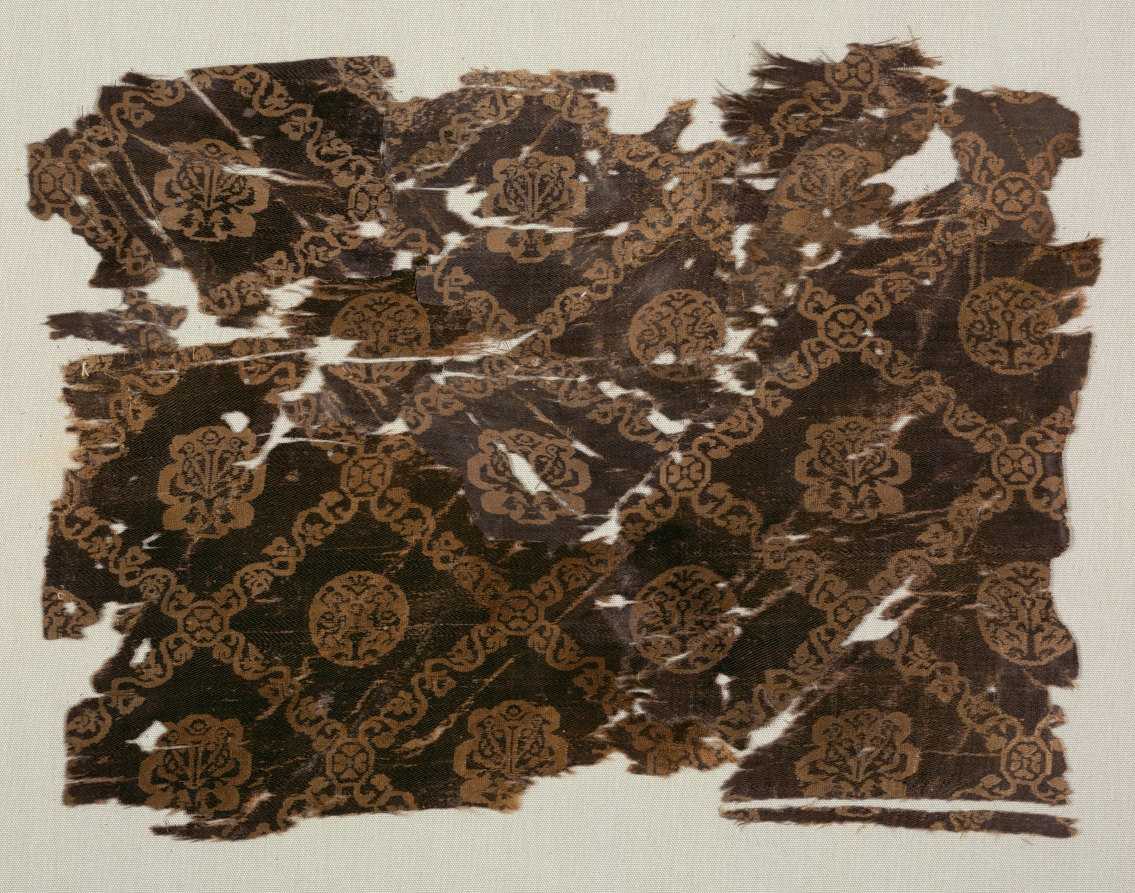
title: Silk with lattice of animals in medallions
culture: Egypt or Syria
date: 600s–800s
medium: Silk: samite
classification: Textile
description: In this fragile silk, vines bearing heart-shaped florets form a diamond grid that displays different motifs in alternate rows. Pairs of ducks with ribbons flying behind their necks flank a palmette tree, showing Iranian influence, and alternate with two birds in lobed medallions. The patterns in such expensive silks were copied in less costly wool tapestry weave by Coptic weavers in Egypt.